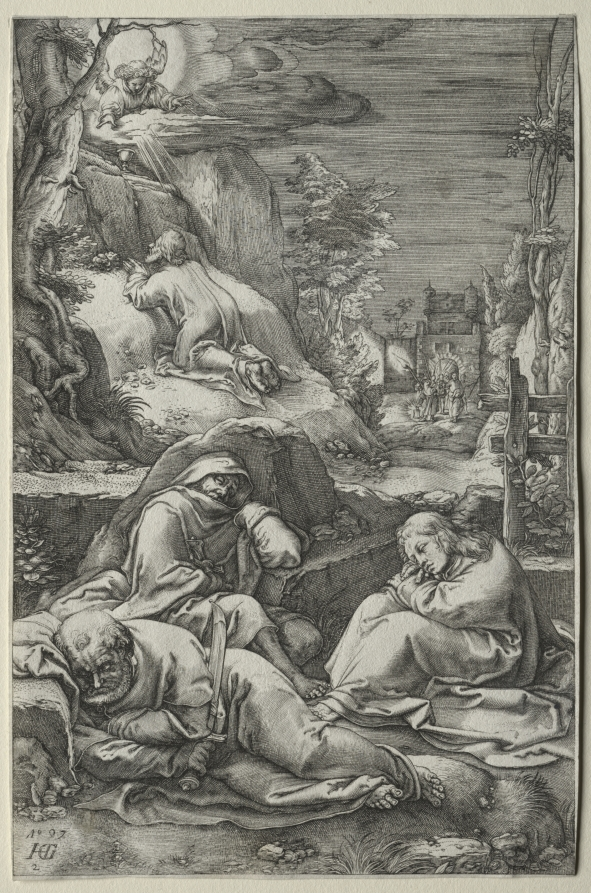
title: The Passion: The Agony in the Garden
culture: Netherlands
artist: Hendrick Goltzius (Dutch, 1558–1617)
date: 1597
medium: engraving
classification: Print